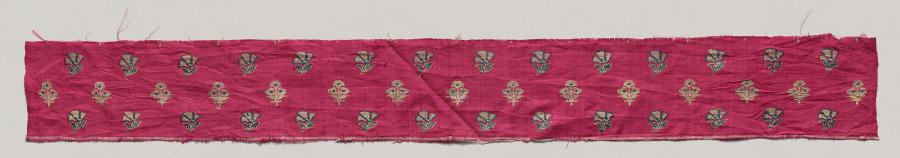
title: Narrow Strip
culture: India, 19th century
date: 1800s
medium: brocade; silk and metal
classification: Textile